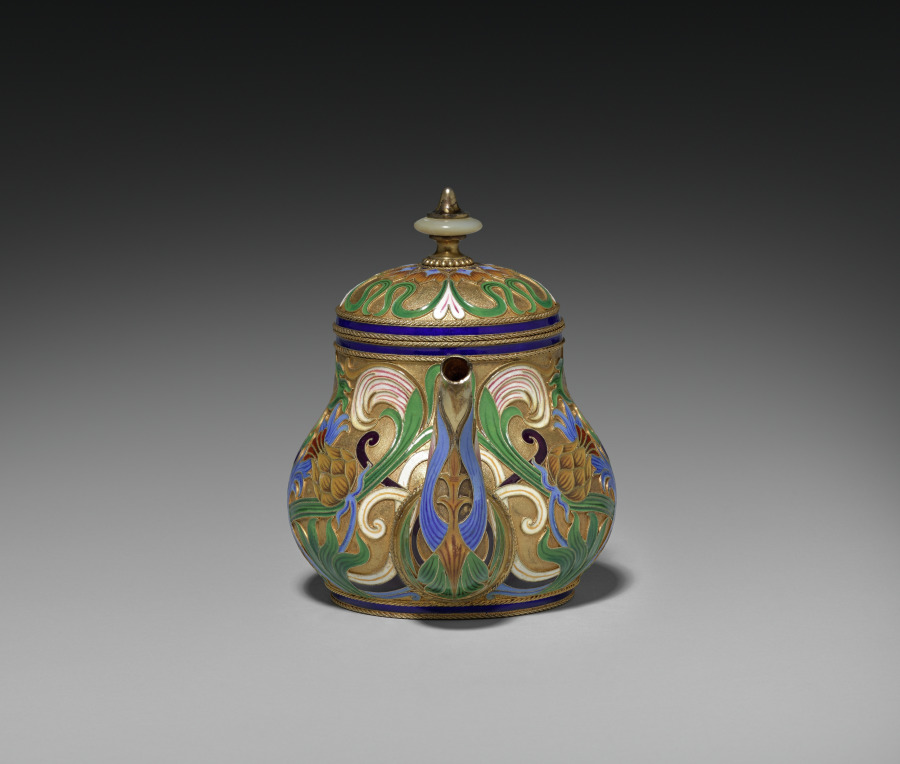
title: Covered Teapot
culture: Russia, St. Petersburg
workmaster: attributed to Feodor Ivanovich Rückert (Russian, 1840–1917)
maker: House of Fabergé (Russian, 1842–1918)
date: 1887–96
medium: silver gilt, opaque cloisonné enamel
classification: Miscellaneous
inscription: 84, St. George [assay mark for Moscow, 1882-1896]; C. Fabergé (in Cyrillic); double-headed eagle [imperial warrant]; St. George; initials of Carl Fabergé (in Cyrillic).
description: Fabergé’s craftsmen in Moscow, especially under the watchful eye of workmaster Feodor Rückert, became known for their work in the pan-Slavic or neo-Russian style, hearkening back to 17th-century motifs of Russian folk art. Often on rather conventional shapes, Rückert and his silversmiths created an explosion of color, achieved through the historic technique of cloisonné enamel in which tiny metal lines are soldered to the surface then filled with glass powders in various colors and fired to create a high gloss finish. The result is a spectacular evocation of the 17th-century originals. Far from mere copies, however, Rückert's designs, such as this tea service, employ naturalistic or abstract motifs in a thoroughly modern adaptation of a remarkable earlier period of Russian art and decoration.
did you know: This covered teapot is part of a larger tea service.